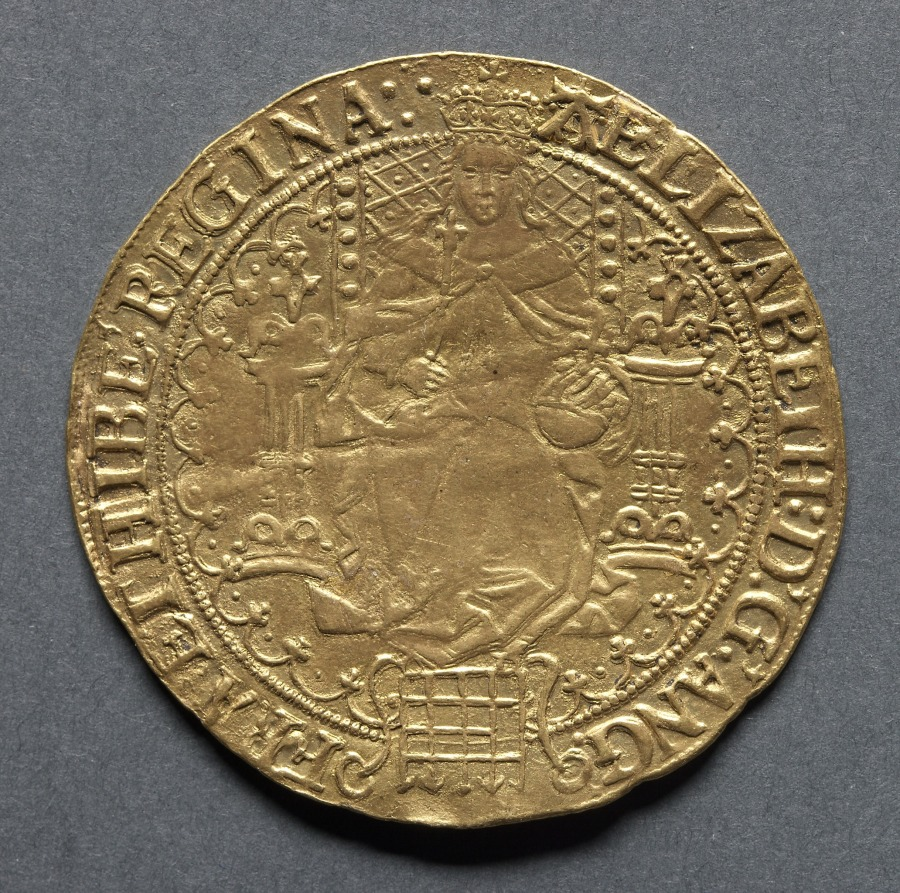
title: Sovereign of Thirty Shillings: Elizabeth I (obverse); Shield of Arms on Tudor Rose (reverse)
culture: England, Elizabeth I, 1558-1603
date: 1583–1603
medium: gold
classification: Coins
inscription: ELIZABETH D G ANG FRA ET HIB REGINA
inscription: A DNO FACTV EST ISTVD ET EST MIRAB IN OCVL IS NRIS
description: A point of interest of this very rare piece is the initial mark. The mark, in the shape of a crosslet, and visible at the start of the inscription, dates the die to 1560–61. However here it has been over stamped with another mark, an A, used in 1583–85. This indicates the reuse of the die of the first coinage during the third coinage period. The restoration of the coinage to its proper fineness was completed during this reign. In 1562 a proclamation had been issued reducing the value of all coinage by one third. It was restored to full value again in 1572, when a new coinage was ordered at the old values. There would still be economic troubles ahead, however.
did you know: The denomination of this coin was so high that as a piece of money it was meant only for the aristocracy or royalty.